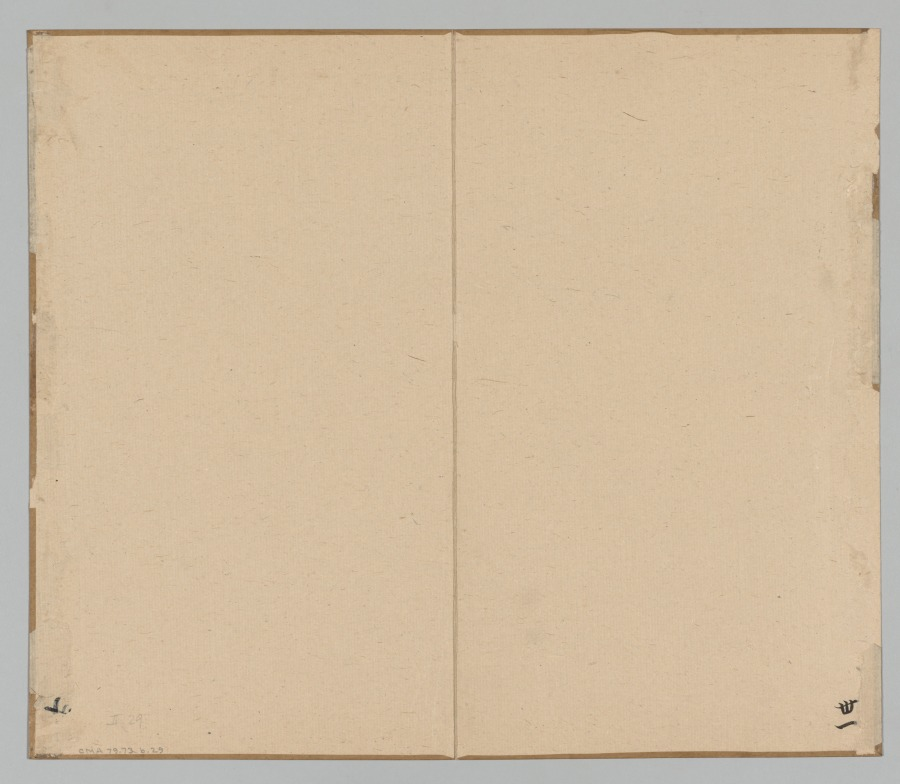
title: Reverberations of Taiga, Volume 2 (leaf 29)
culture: Japan, Edo period (1615–1868)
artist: Aoki Shukuya (Japanese, d. 1802)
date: mid- to late 1700s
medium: double-leaf from a pair of albums; ink and light color on paper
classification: Portfolio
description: Traditionally, young painters in Japan began their studies with an established master-painter. The master's compositions invariably became models that the apprentice copied to learn various ink and brush techniques. Shukuya was a pupil of the famous Kyoto artist Ikeno Taiga, whose style is reflected in these sketches of rocks, trees, and mountains.